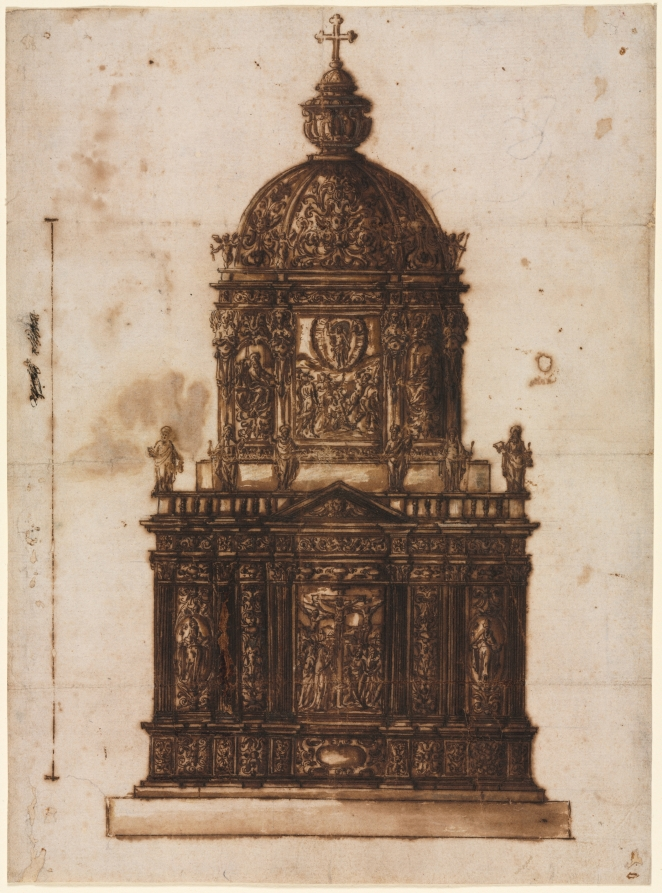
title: Design for a Ciborium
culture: Italy, 17th century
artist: Fantoni Family Workshop (Italian)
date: 1600s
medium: pen and brown ink (iron gall) and brush and brown wash, with graphite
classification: Drawing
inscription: center left, in brown ink: [illegible] [illegible] [sideways, both crossed out] ; VERSO, lower center, in graphite: cel ; lower right, in graphite: A 3765